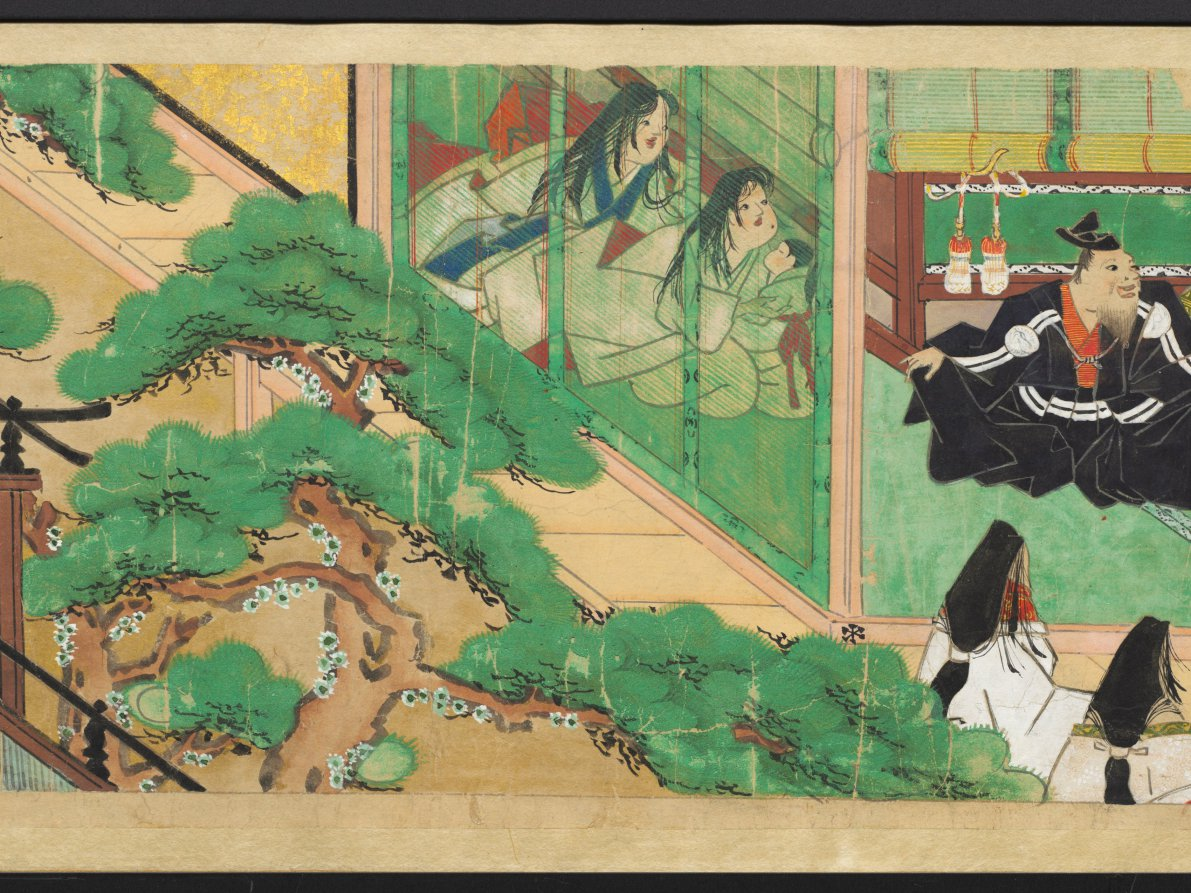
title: The Saltmaker's Story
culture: Japan, Edo period (1615–1868)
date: early 1600s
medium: One of a pair of handscrolls; ink, color, and gold on paper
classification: Painting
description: Once read and copied by girls at New Year’s celebrations and included in dowries, The Saltmaker’s Story is a rags-to-riches tale in which daughters are gifts from the gods. Despite his simple outlook, the main character progresses from humble roots as an associate at Kashima Shrine to the elite status of grandfather of the emperor through the intervention of the Kashima deity. The Saltmaker’s Story is traditionally presented in a set of three scrolls, but the text of this set has been removed by a previous owner, who remounted the illustrations as a pair. The paintings of this one take us from right to left through the first half of the tale.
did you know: This handscroll originally had texts before its paintings, but the texts were removed.